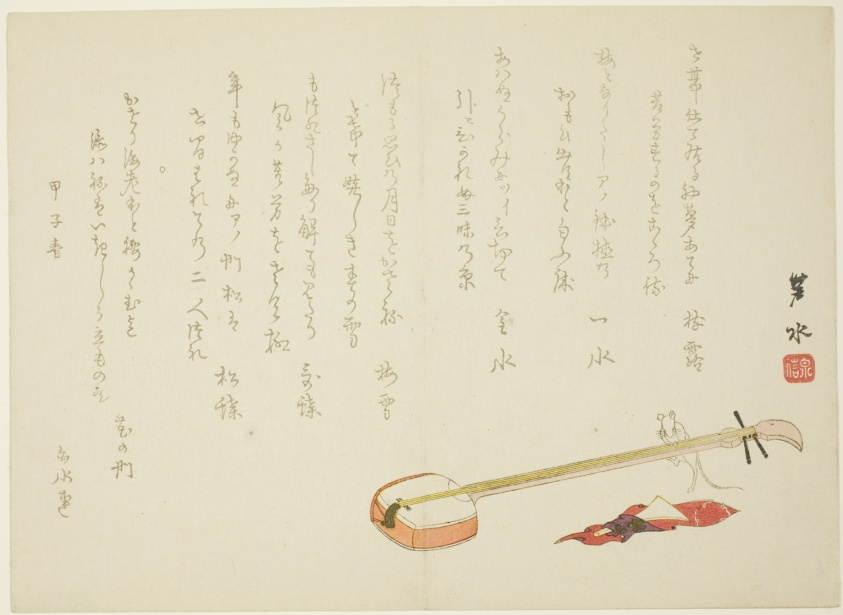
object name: Print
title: Shamisen and Rat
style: Japanese (culture or style)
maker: Imoto Rosui (Japanese, active mid-19th century)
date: spring 1864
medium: Color woodblock print; surimono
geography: Japan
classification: woodblock print; print; asian art